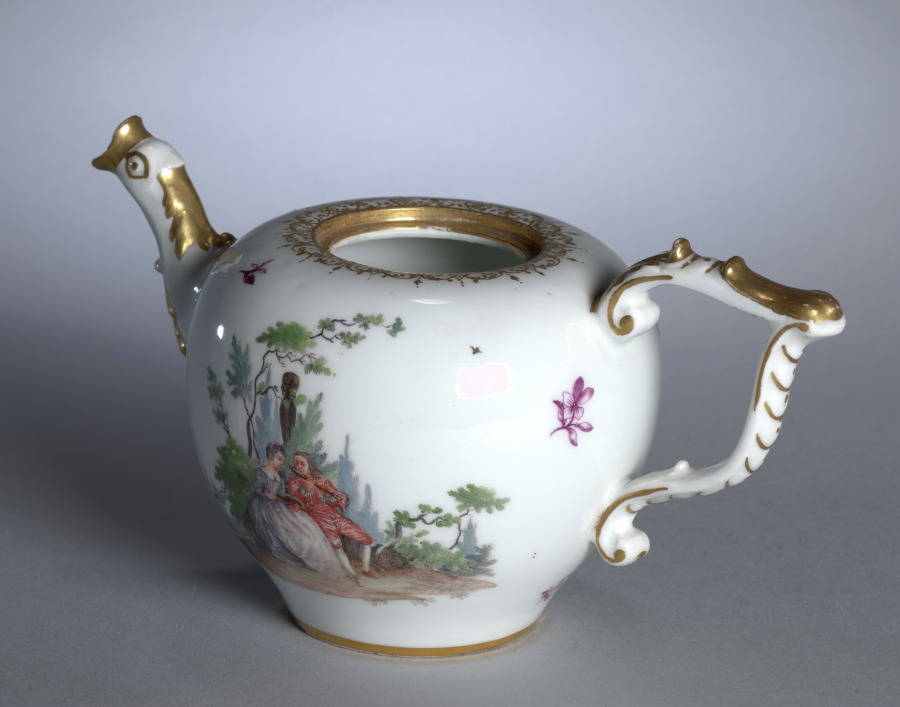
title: Teapot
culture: Germany, Meissen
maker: Meissen Porcelain Factory (German, est. c. 1710)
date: c. 1750–70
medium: porcelain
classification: Ceramic